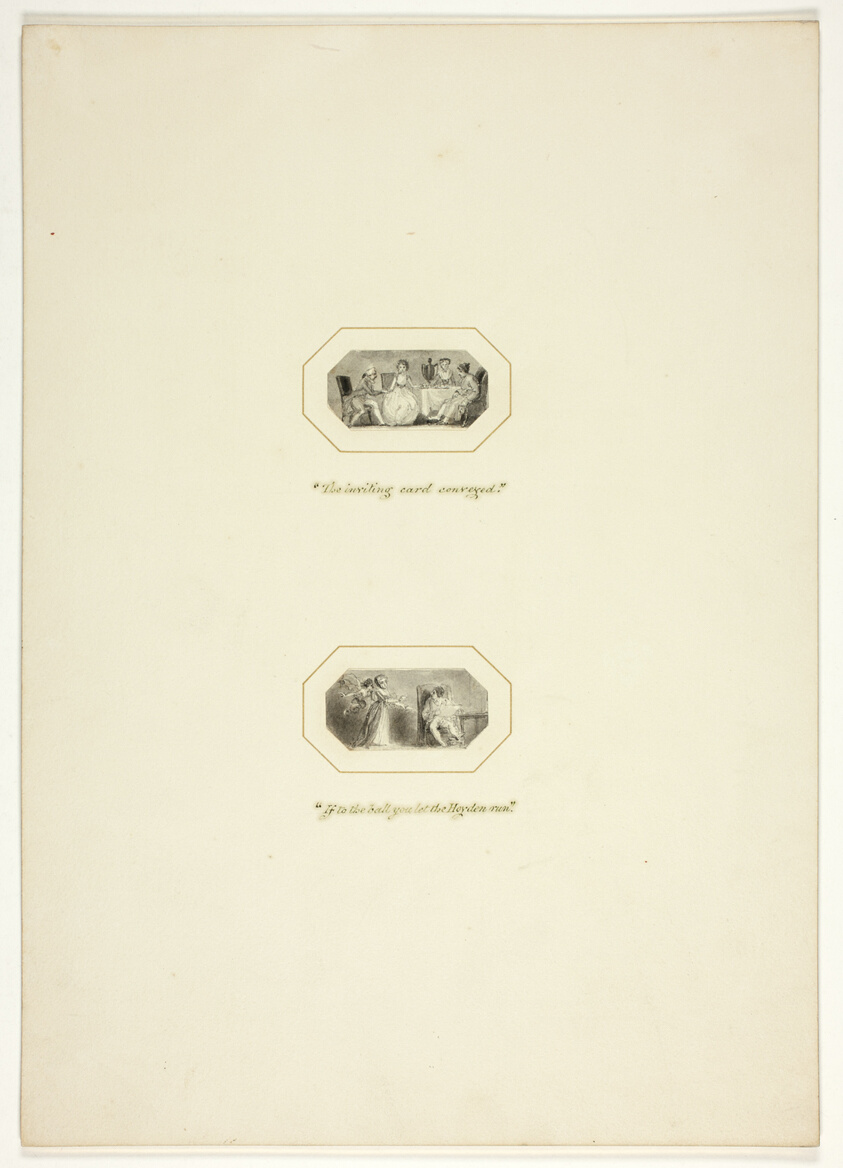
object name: Drawing and Watercolor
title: Study for a plate from The Triumphs of Temper, in the 1796 Royal Engagements Pocket Book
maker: Thomas Stothard (English, 1755-1834)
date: c. 1795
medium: Ink wash on paper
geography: England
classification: ink or chalk wash; drawings (visual works); prints and drawing